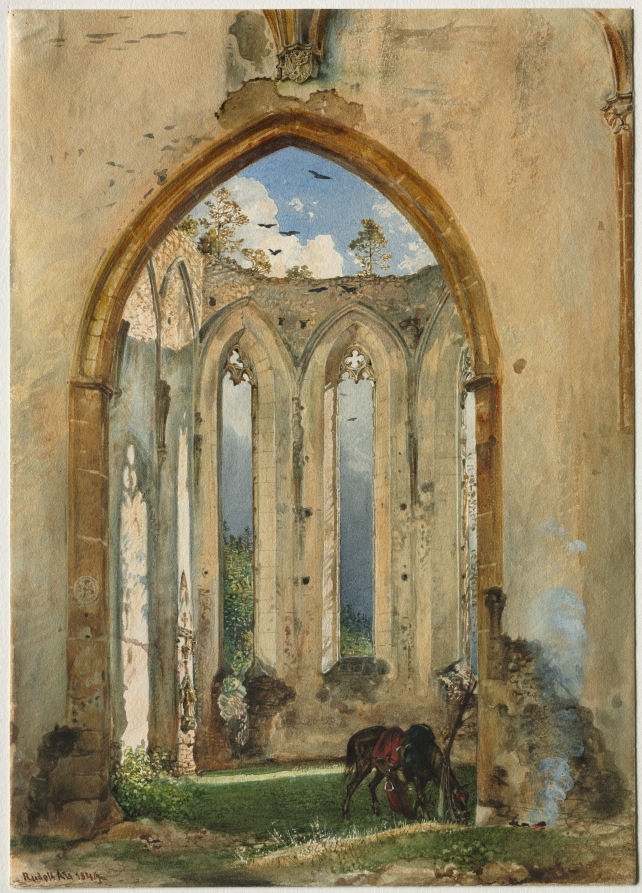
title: Ruin of a Church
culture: Austria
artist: Rudolf von Alt (Austrian, 1812–1905)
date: 1849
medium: watercolor with gouache and glazing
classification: Drawing